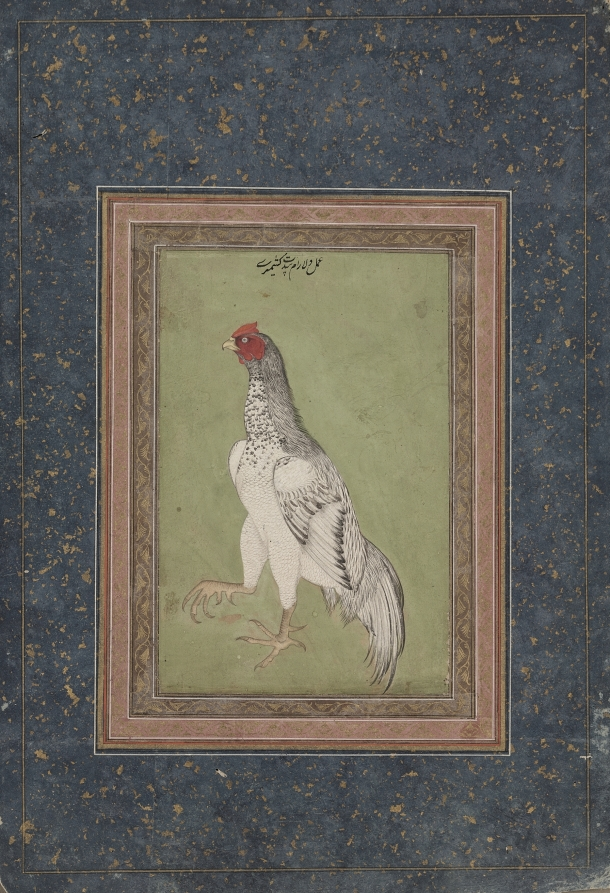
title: Rooster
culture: India, Mughal, 17th century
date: c. 1620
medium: Gum tempera, ink, and gold on paper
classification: Painting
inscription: verso, upper center: Dilaram Pandit Kashmiri (by a later hand)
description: This bird, with its fierce expression, sharp beak, and spurred feet, may have been a champion in the cockfighting ring. The Mughal emperor Jahangir requested that his royal court artists paint portraits of remarkable birds and animals with as much realism as possible. He felt that such paintings enhanced feelings of amazement beyond hearing or reading an account.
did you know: This page belonged to the owner of Cleveland’s Leisy Brewing Company, est. 1873.